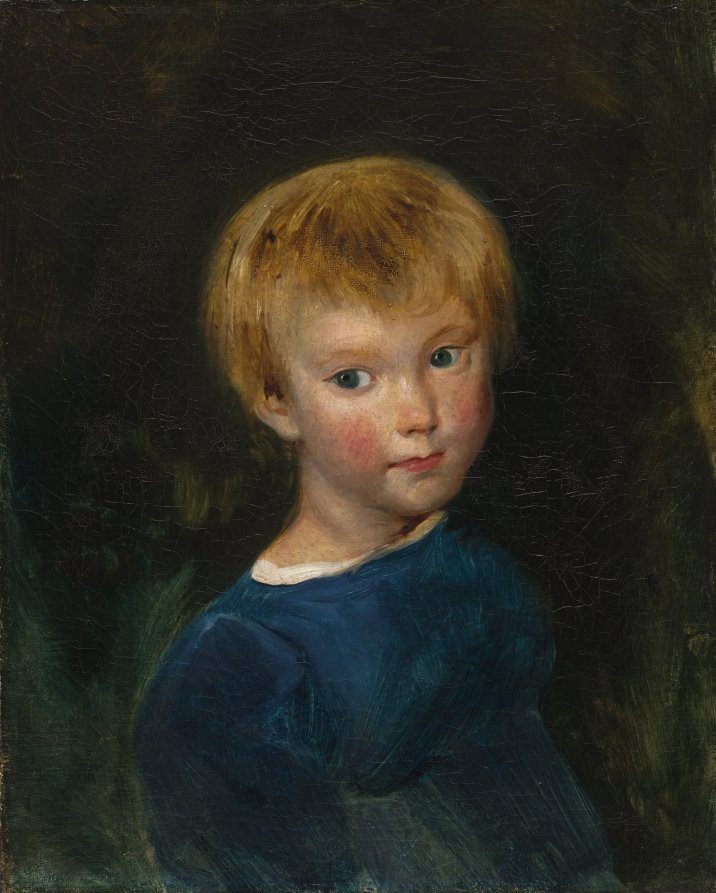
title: Marguerite-Juliette Pierret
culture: France, 19th century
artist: Eugène Delacroix (French, 1798–1863)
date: c. 1827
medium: oil on fabric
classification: Painting